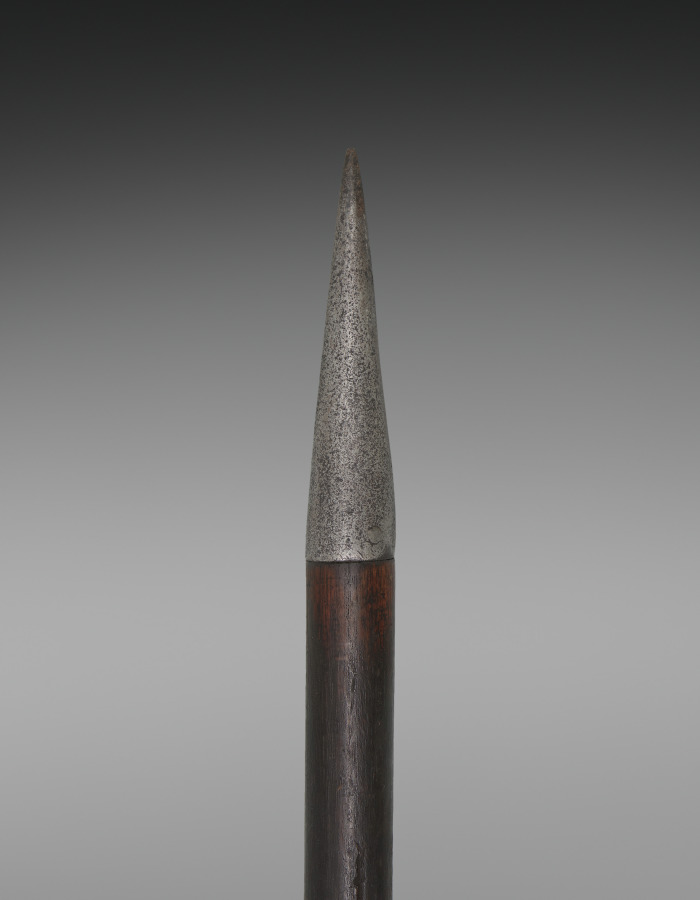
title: Gun Rest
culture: Italy, 17th century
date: 1600s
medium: steel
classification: Arms and Armor